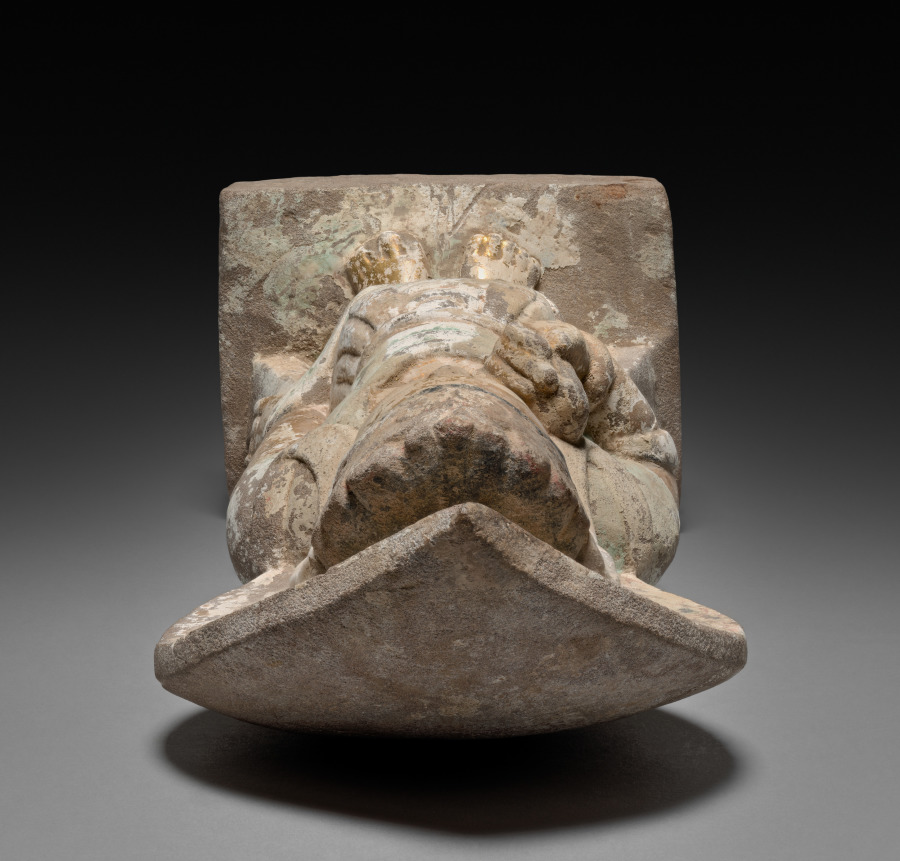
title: Bodhisattva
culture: China, Sui dynasty (581-618) - Tang dynasty (618-907)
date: late 500s–early 600s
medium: stone with polychromy and gilding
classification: Sculpture